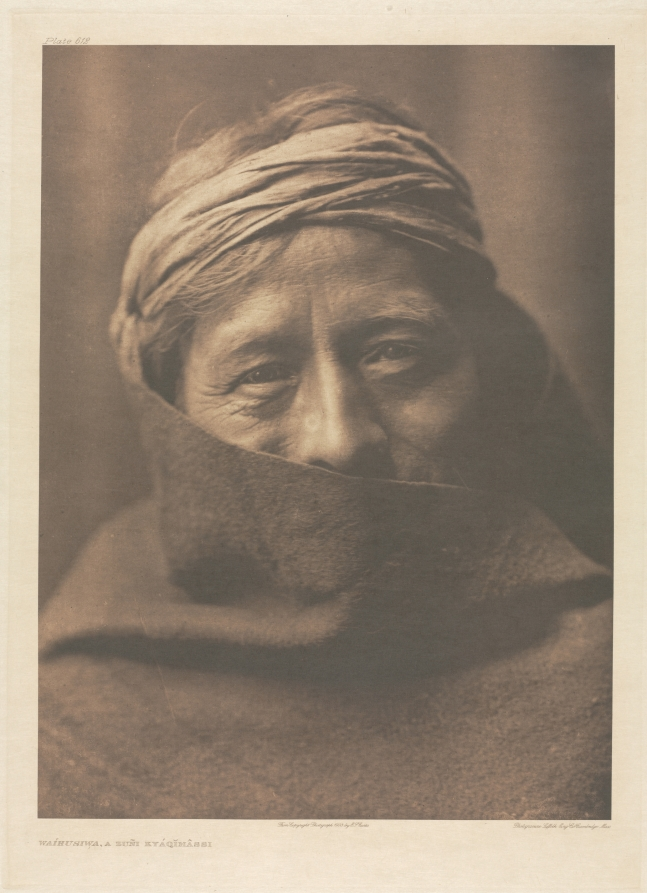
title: Portfolio XVII, Plate 612: Waíhusiwa, A Zuñi Kyáqimâssi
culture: America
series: The North American Indian: being a series of Portfolios picturing and describing the Indians of the United States, the Dominion of Canada, and Alaska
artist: Edward S. Curtis (American, 1868–1952)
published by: The University Press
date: 1903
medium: photogravure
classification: Portfolio